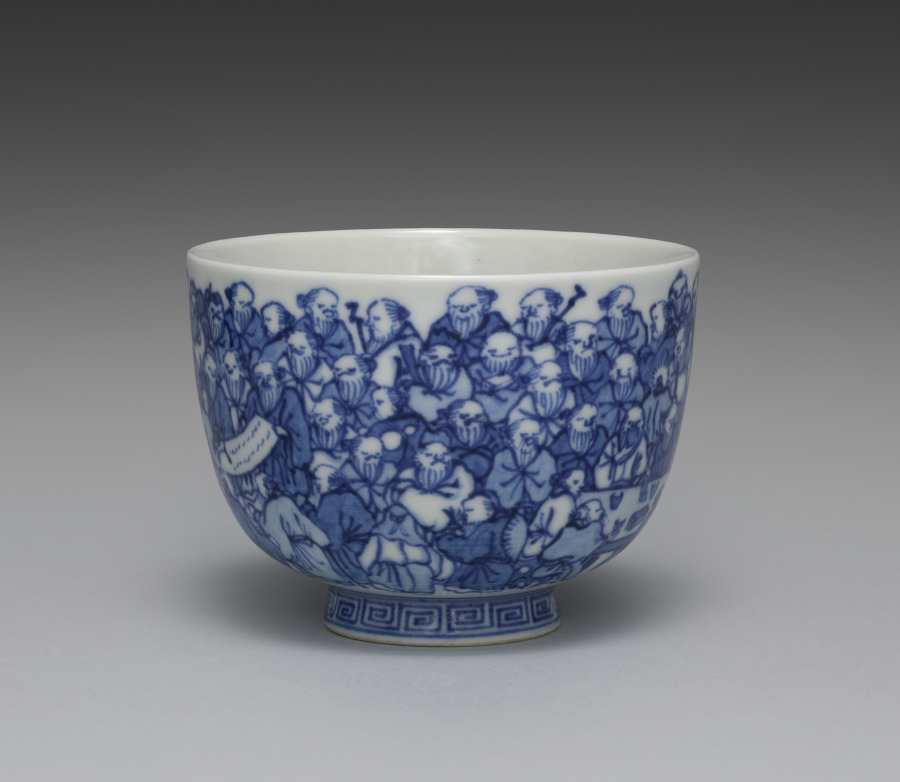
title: Teacup from Teacups with a Hundred Sages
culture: Japan, Meiji period (1868–1912)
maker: Seifū Yohei III (Japanese, 1851–1914)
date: 1893–1914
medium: One from a set of five teacups; porcelain with underglaze blue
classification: Ceramic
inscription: 清風造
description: Each of these five teacups has a painting of identical design in underglaze blue, but as the tiny figures are drawn entirely by hand, each cup has its own personality. The theme of the sencha cups is an assembly of sages or immortals, literally “a hundred venerable [people]” (hyakurō). The myriad figures crowd the scene in groups. The god of longevity, with his tall forehead, sits with his cranes, having flown in from Mt. Penglai on the Isle of the Immortals. Seven long-bearded sages sit around a stone table, chatting and drinking; one is seated on an enormous gourd. Of course, there is a stack of books on the table, and elsewhere, scrolls are being written upon or read—in one case held very close by a sage who is wearing glasses. The design was enormously popular in ceramics made for those engaged in literati culture.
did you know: Seifū Yohei III (1851–1914) produced many works for tea gatherings where people drank Chinese-style leaf-tea (sencha).